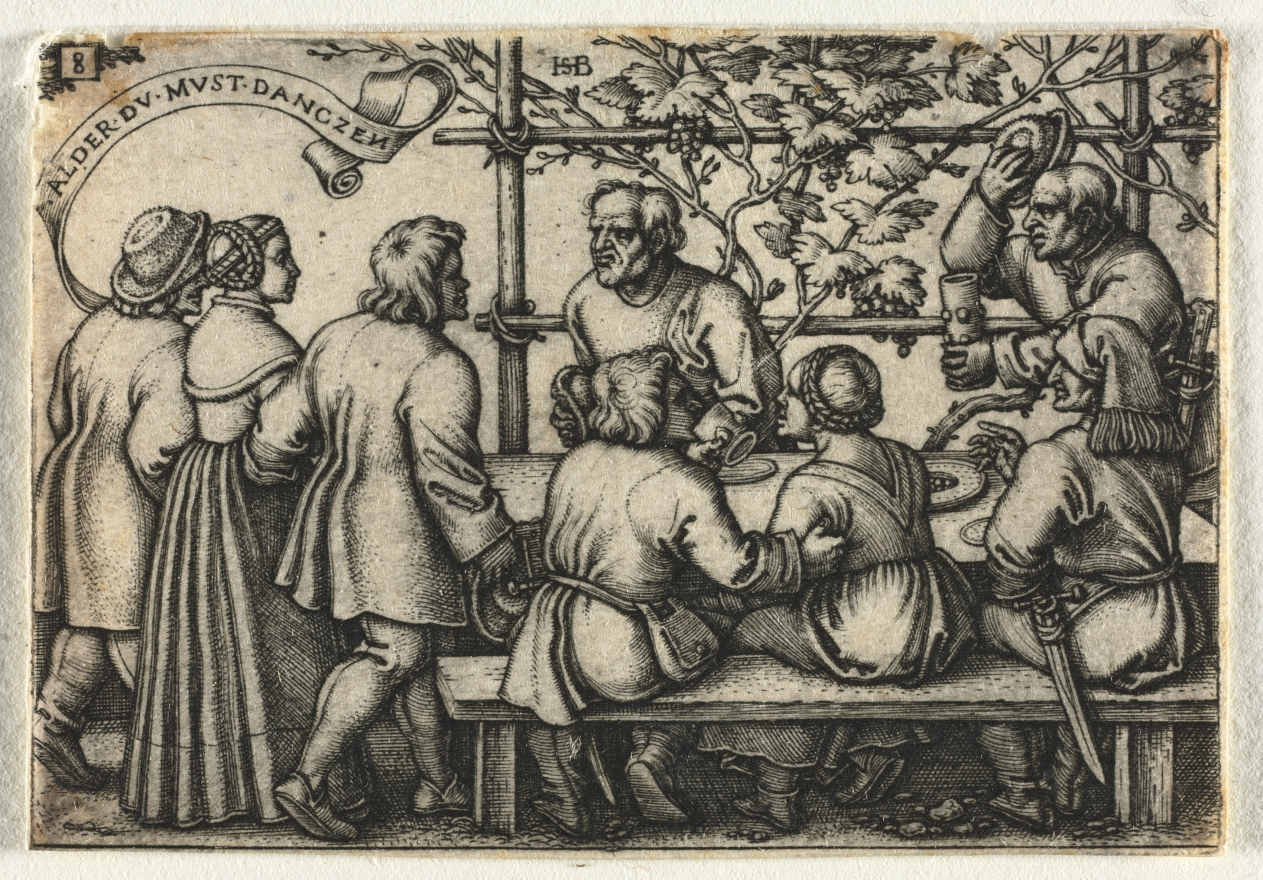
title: The Peasant Wedding or the Twelve Months: No. 8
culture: Germany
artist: Hans Sebald Beham (German, 1500–1550)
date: 1546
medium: engraving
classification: Print